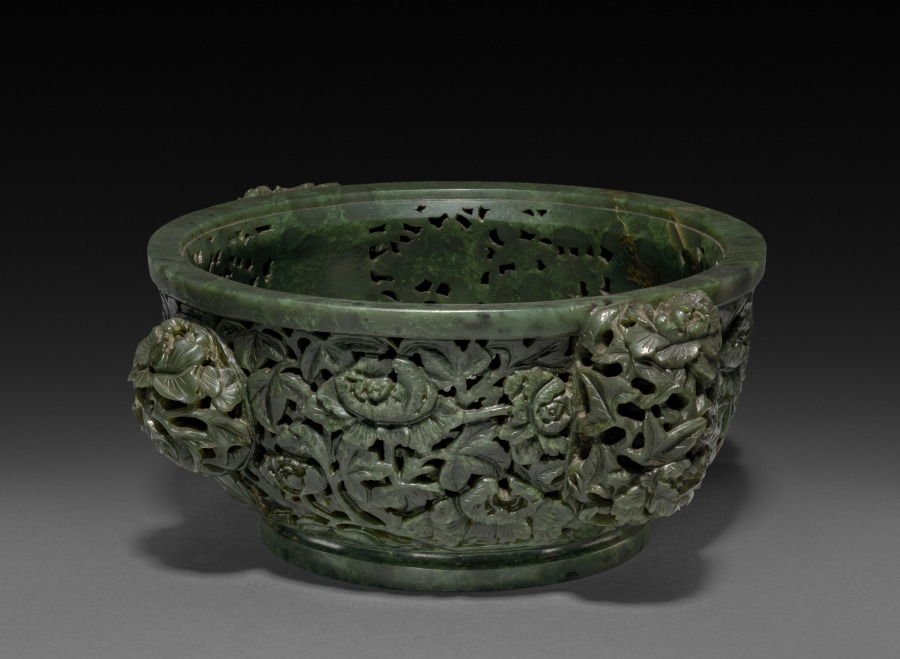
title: Fragrance Container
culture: China, Qing dynasty (1644–1911), Qianlong reign (1736–95)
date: 1736–95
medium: jade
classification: Jade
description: In the Qing (1644–1911) dynasty, luxury items became more affordable to larger parts of the society, including women, merchants, and literati in non-official positions. Imperial patronage and a growing urban population encouraged consumption of luxury goods and local craftmanship. This spinach-green jade incense burner has pierced floral designs and four pierced floral handles. It illustrates the superb carving skills and the creative mind of its accomplished creator, who sought clients on a competitive market